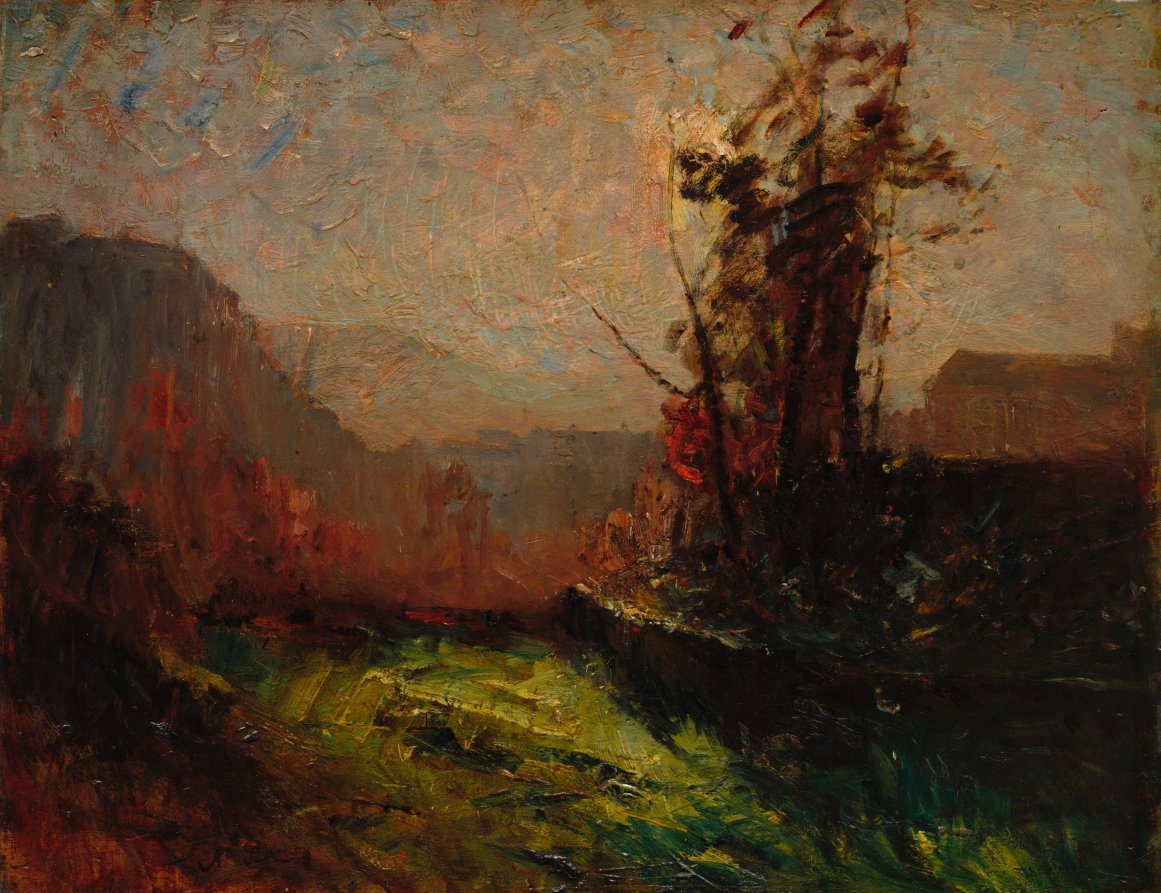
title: Crémieu, Seen from Chaillonnette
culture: France, 19th century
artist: François-Auguste Ravier (French, 1814–1895)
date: c. 1867–1872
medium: oil on wood panel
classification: Painting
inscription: Signed lower left in black, probably a stamp: Ate Ravier